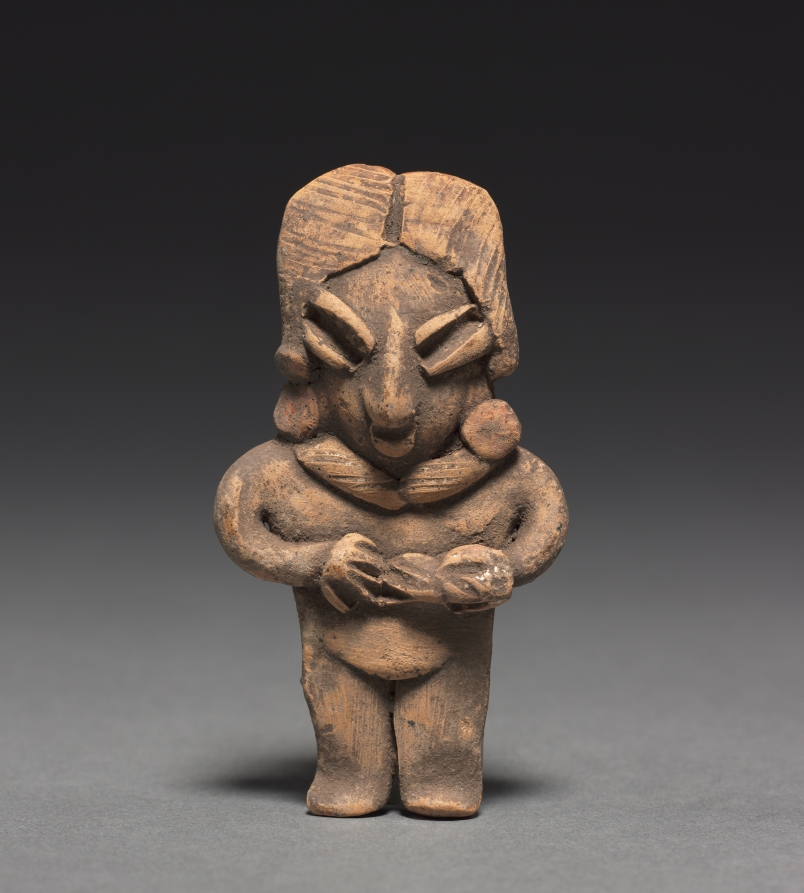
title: Male Figurine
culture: Mesoamerica, Guanajuato or Michoacán, Chupícuaro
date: 400–100 BCE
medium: ceramic, pigment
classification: Sculpture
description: The Chupícuaro culture, located north of Mexico City in the state of Guanajuato, created a distinctive ceramic tradition including small clay figurines. This example is said to belong to a group of ten figurines from the same burial or cache (1990.145–154). The group includes both males and females that can be sorted into couples based on size.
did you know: Groups of figurines were sometimes arranged in scenes and likely used in household rituals.